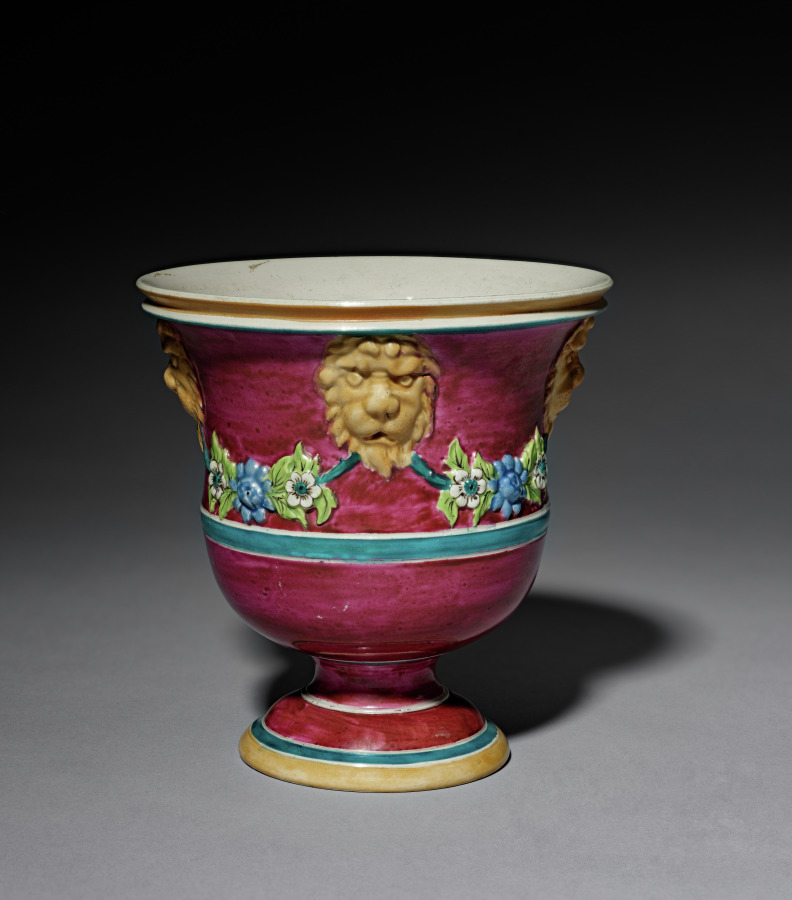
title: Jardinière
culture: England, Staffordshire, 18th century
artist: Staffordshire Factory (British)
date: c. 1760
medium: salt-glaze earthenware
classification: Ceramic